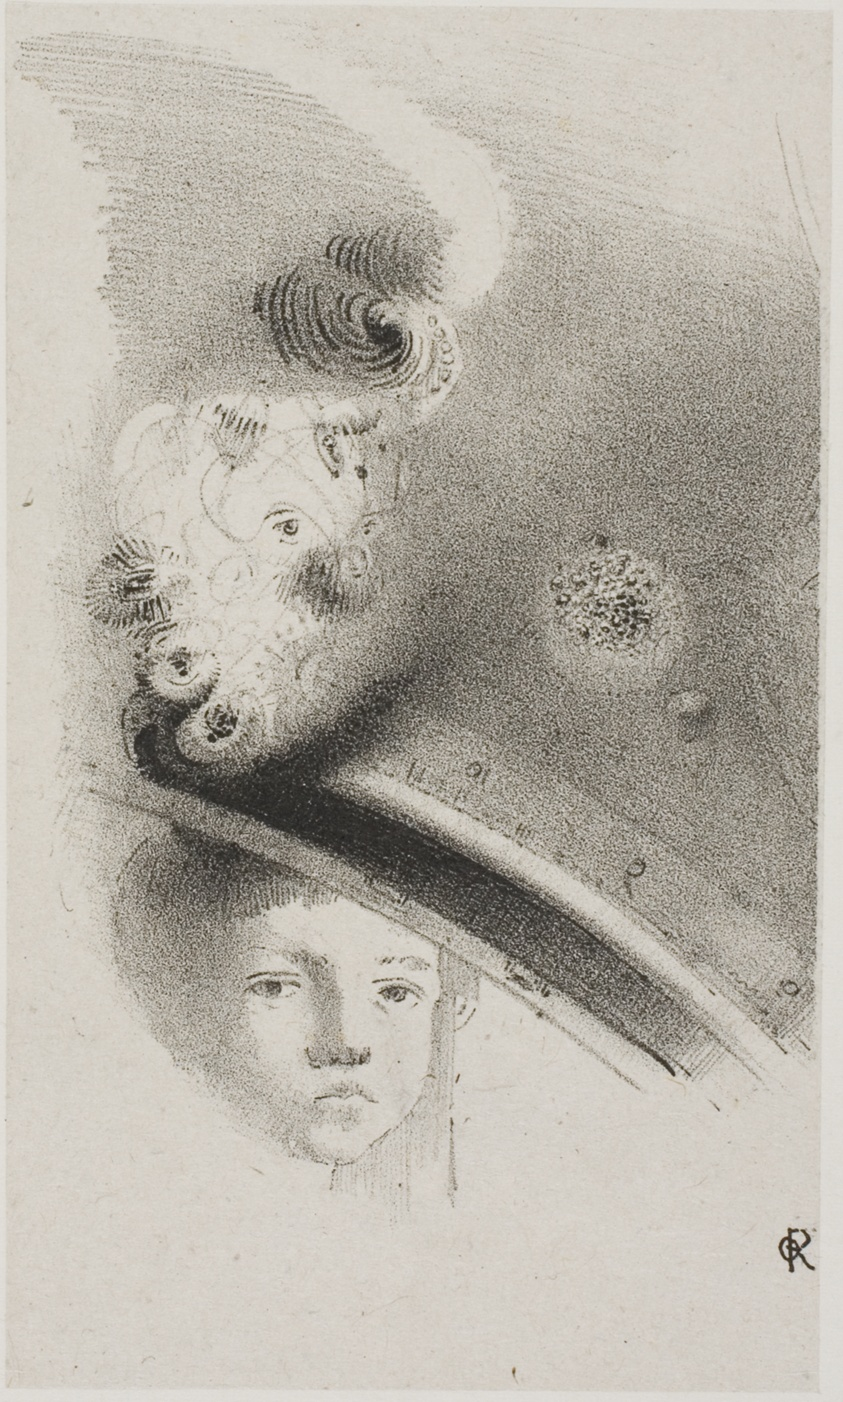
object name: Print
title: Untitled Trial Lithograph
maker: Odilon Redon (French, 1840-1916)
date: 1900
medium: Lithograph in black on light gray China paper laid down on ivory wove paper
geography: France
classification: lithograph; print; prints and drawing; paper